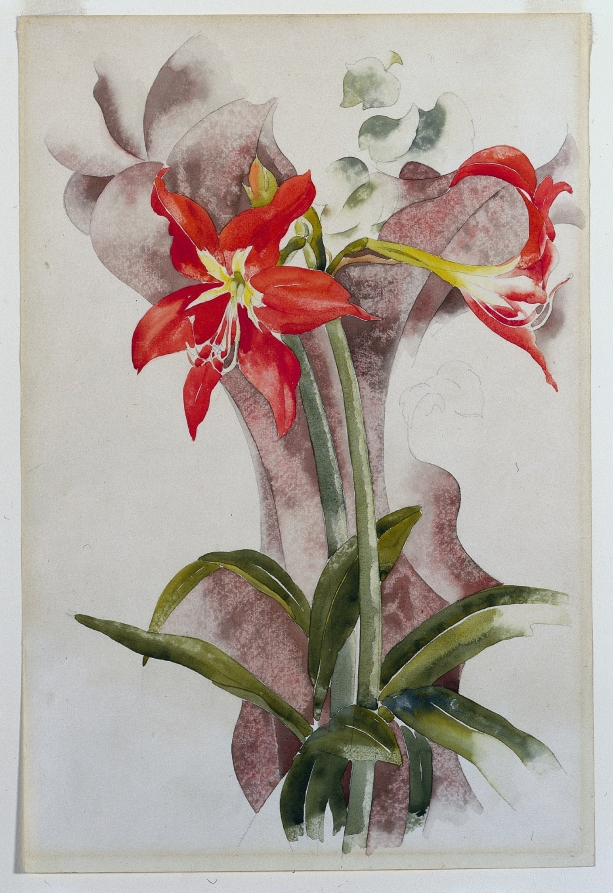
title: Amaryllis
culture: America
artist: Charles Demuth (American, 1883–1935)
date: c. 1923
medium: watercolor over graphite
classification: Drawing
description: Still-life was one of Charles Demuth's favorite genres, and he created works on this theme throughout his career. This drawing of a blooming amaryllis was completed while the artist was convalescing with diabetes in his hometown of Lancaster, Pennsylvania. Because of his physical weakness, he was limited to working in watercolor, a less demanding medium than painting, and to subjects that he could easily observe, such as flowers. Demuth drew the amaryllis's form in graphite and then brushed on watercolor precisely, using a blotter to develop the pebbly texture seen throughout.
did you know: This watercolor was purchased by the museum during its first exhibition, at Daniel Gallery in New York, and was one of the first works by Charles Demuth to enter a public museum collection.